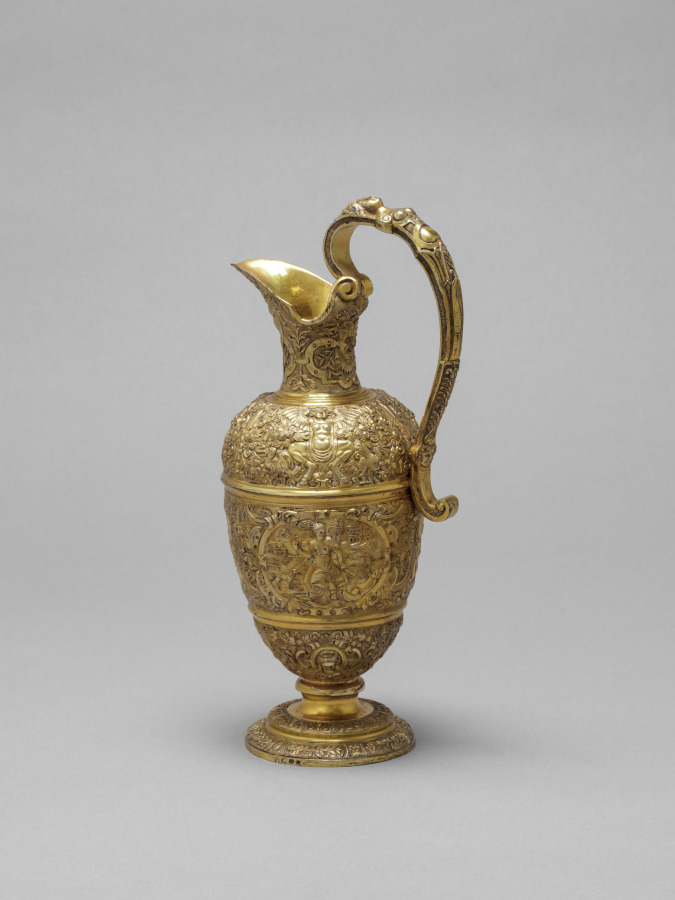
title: Ewer with Relief Scenes of Allegories of War, Peace, and Abundance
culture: France, 17th century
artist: workshop of Caspar Enderlein (German)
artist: copy after François Briot (French)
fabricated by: Hans Sigmund Geisser (German)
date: 1645–65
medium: silver gilt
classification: Silver